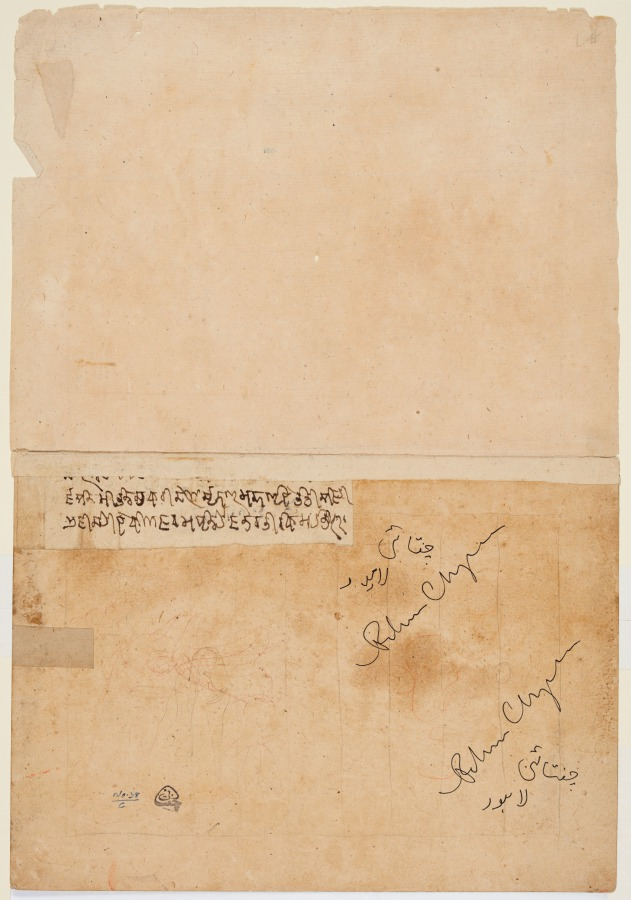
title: Krishna celebrates Holi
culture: Northern India, Pahari kingdoms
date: c. 1770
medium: gum tempera, gold, and silver on paper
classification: Painting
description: During the festival of Holi, Hindus celebrate the coming of spring by playfully throwing and shooting colored water and powders at one another. Among all the cowherd boys with whom he grew up, Krishna, a Hindu god incarnated on earth, is the only one able to reach the heart of a gopi, or milkmaid, with a well-aimed plunger full of colors. Raucous with sound as well as color, some of the boys play the drum, flute, and horns; girls strum a vina (stringed instrument), play a flute, and blow a whistle.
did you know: The painter has sprinkled color on the background to suggest colors thrown in the air.